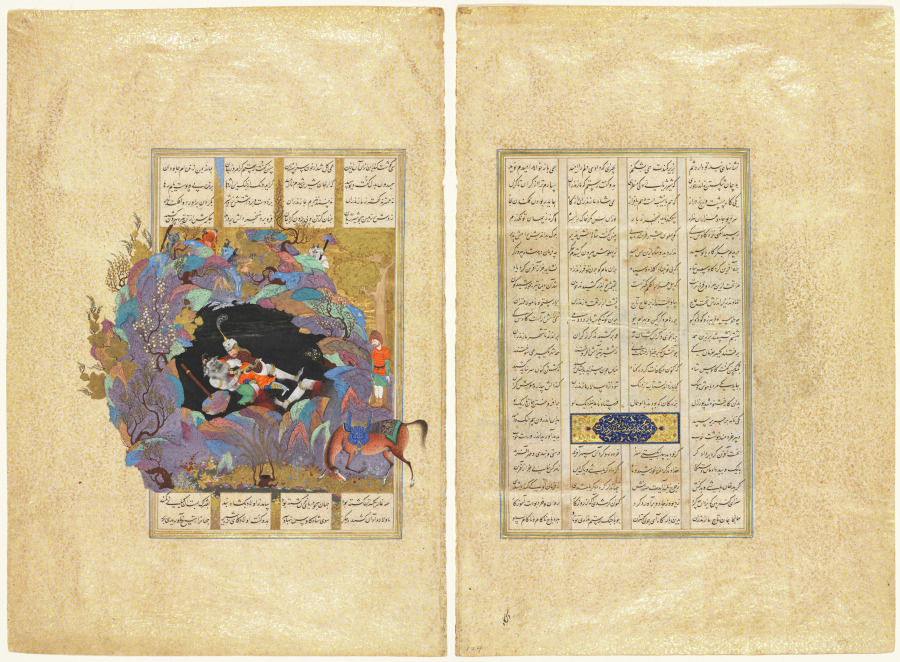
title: Rustam's seventh course: He kills the White Div, folio 124 from a Shah-nama (Book of Kings) of Firdausi (Persian, about 934–1020)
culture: Iran, Tabriz, Safavid period (1501-1722)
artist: attributed to Mir Musavvir (Iranian, c. 1510–1555)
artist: attributed to Abd al-Vahhab (Persian, active c. 1516)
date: 1520–37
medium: Gum tempera, ink, gold, and silver on paper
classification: Manuscript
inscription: Script: Nasta'liq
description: The legendary hero Rustam brutally takes the demon chief’s liver blood, needed to cure his king of blindness. Paintings from the Shah-nama made for the Persian ruler Shah Tahmasp (reigned 1524–76) were acclaimed in their day for their brilliant coloring and refinement. Seven of the artists who contributed to this book moved to India to lead the new Mughal painting workshop in the 1550s. They introduced to the Indian artists a more complex color sensibility and preference for presenting faces in three-quarter view, as opposed to in profile.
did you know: The Shahnameh is a mixture of a mythology and a history of the Iranian people.